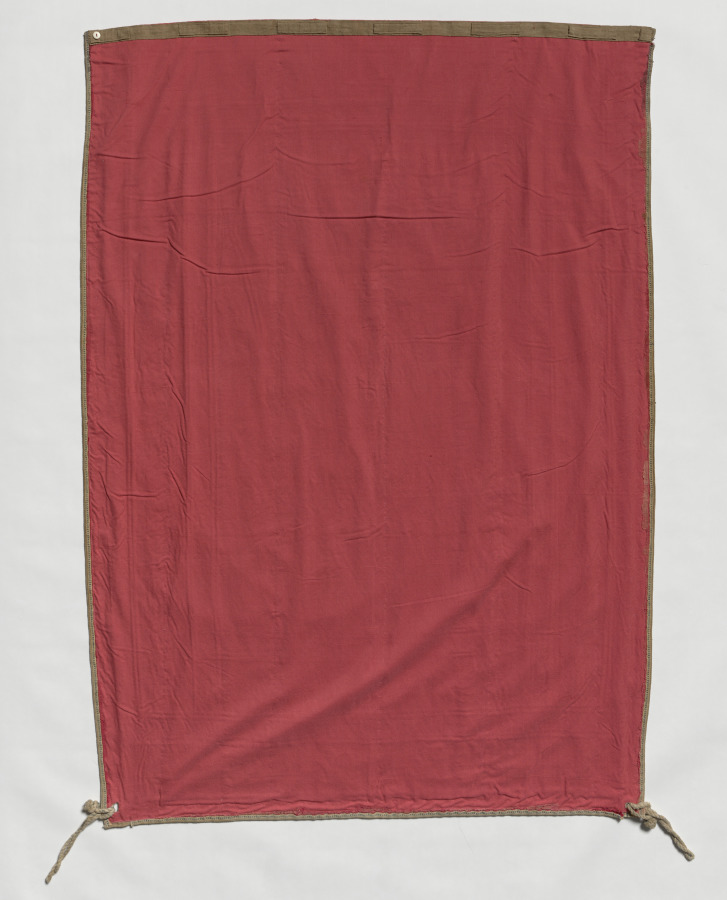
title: Royal Round Tent made for Muhammad Shah (wall panel with one design unit)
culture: Iran, Rasht, Qajar period (1779-1925)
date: 1834–48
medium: Interior: wool: plain weave, inlaid work; silk: embroidery, chain stitch; tape, leather; Exterior: cotton, wool: plain weave; rope, iron ring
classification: Textile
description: Royal tents were potent symbols of authority, wealth, and power throughout the greater Middle East. Rulers owned thousands of tents. They were used for shelter, shade, and innumerable functions in tent compounds that were essential for imperial ceremonies, travel, and military campaigns. Distinguished by size with elaborately decorated interior walls and ceilings, tents could be as large as castles. Opulent tents were also presented as imperial gifts. Tents are only known through documents before 1600. For example, in Baghdad in 809, Caliph Harun al-Rashid owned 4,000 ceremonial tents and 150,000 camping tents that were stored in the imperial Abbasid treasury. An astonishing variety and quantity of tents were housed in the royal Fatimid tent storeroom in Cairo in 1068-69, including "military tents, fortress tents, and castle tents, manufactured of . . . gold-brocaded stuff embroidered with designs of elephants, wild beasts, horses, peacocks, birds." Since 1600, Ottoman Turkish tents with elaborate floral decoration have been preserved in Istanbul in the Topkapi Palace Museum and Military Museum, and in European collections as war booty, primarily from the Ottoman Turks' attempt to conquer Vienna in 1683. These tents are not done in the Rasht technique, but rather are applique. In contrast, royal tents from Iran are extremely rare. This spectacular ceremonial tent is embroidered with the name of its owner, Muhammad Shah, who ruled Iran from 1834 to 1848 during the Qajar dynasty. The radiant jewellike interior features exuberant flora, blossoming vines, and robust birds made with colored wool embellished with silk-thread embroidery.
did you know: Rasht work is named after the city on the Caspian Sea in present-day Iran, which was a major silk trade center with numerous textile workshops.